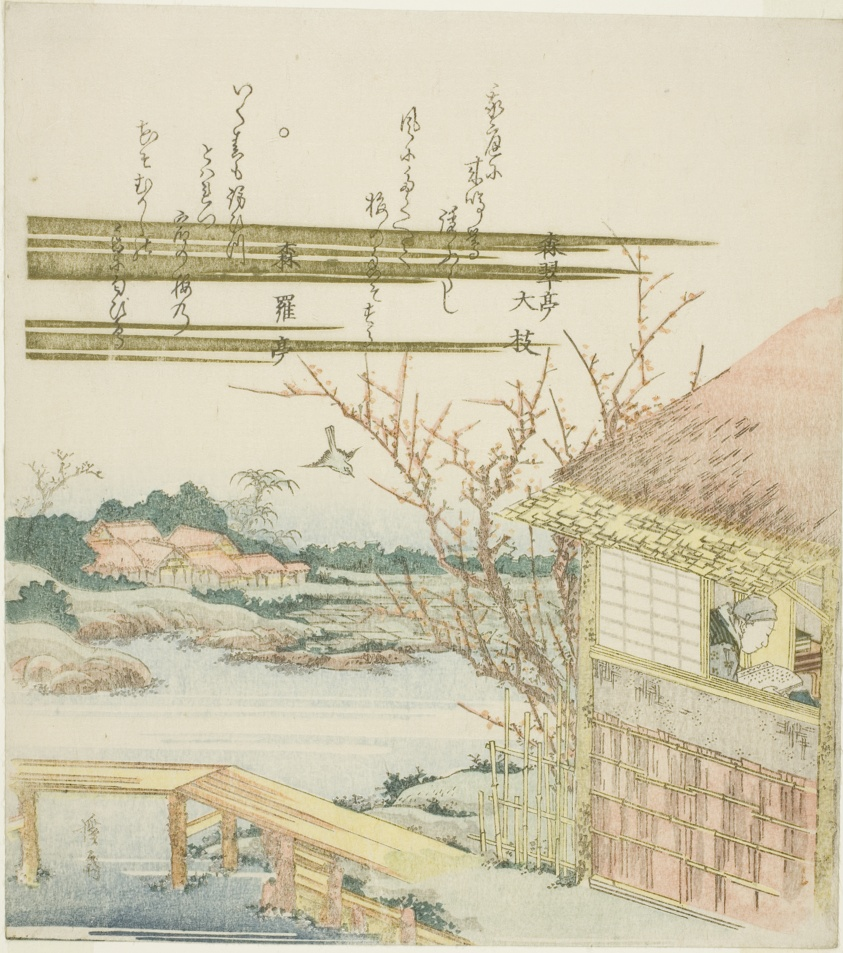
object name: Print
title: Scholar Reading in a Hut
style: Japanese (culture or style)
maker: Keisai Eisen (Japanese, 1790-1848)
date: c. 1820s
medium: Color woodblock print with metallic pigments; shikishiban, surimono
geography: Japan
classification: woodblock print; print; asian art